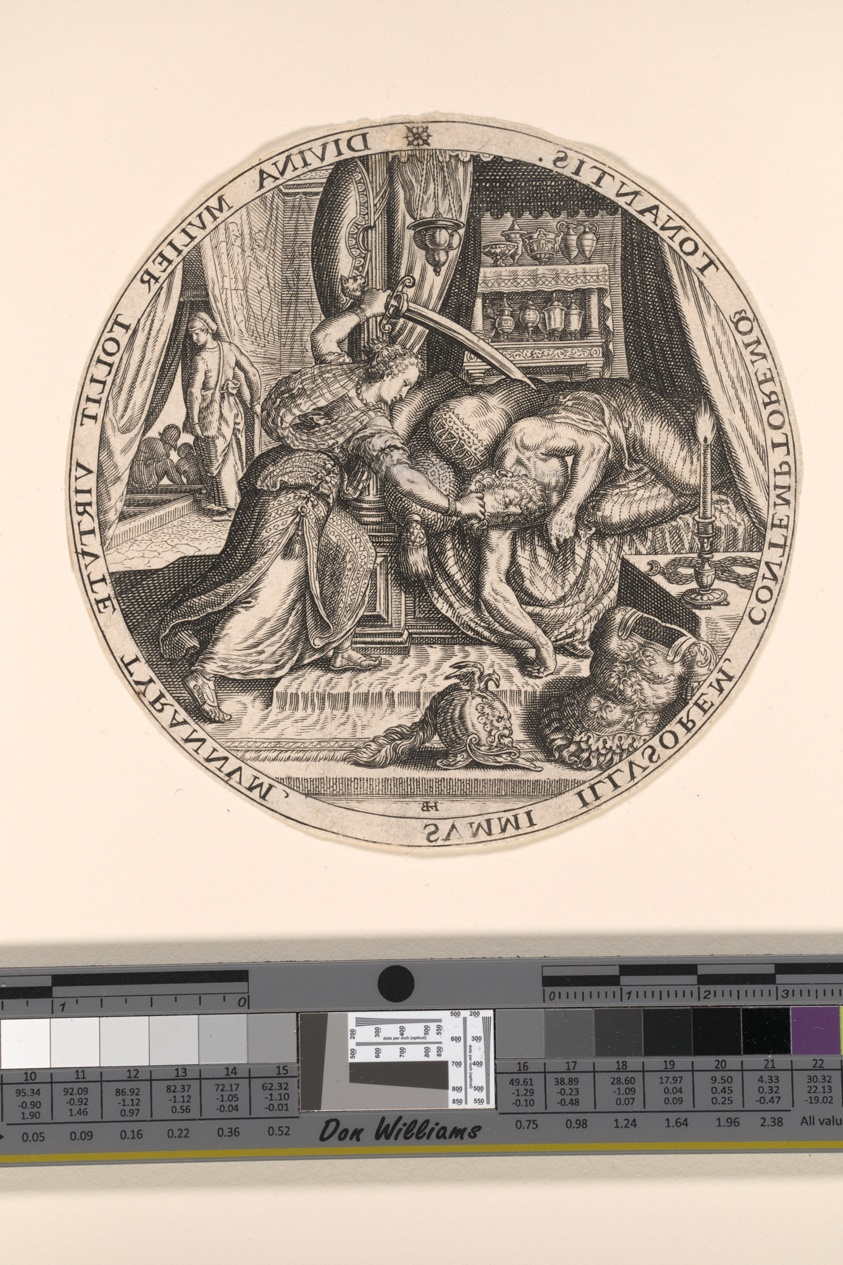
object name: Print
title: Judith and Holofernes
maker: Johann Theodor de Bry (Franco-Flemish, 1561–1623); after Maerten van Heemskerck (Netherlandish, 1498-1574)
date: 1580/1600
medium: Engraving on paper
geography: France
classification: engraving; paper; print; prints and drawing